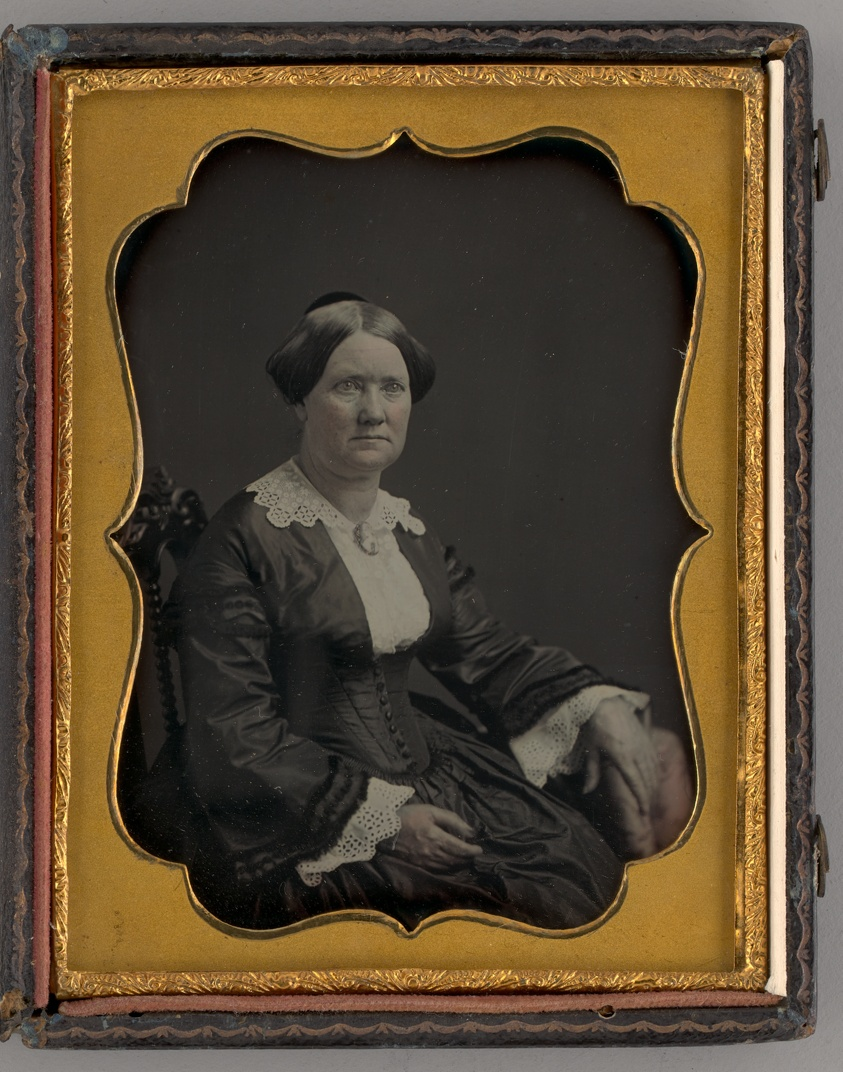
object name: Photograph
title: Untitled (Portrait of a Woman)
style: 19th century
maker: Unknown maker; American, 19th century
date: 1858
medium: Daguerreotype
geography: United States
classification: portrait; photograph; photographic process; photography; portrait; daguerreotype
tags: lundberg collection, portrait, female, woman, portraits: female subject, portraits